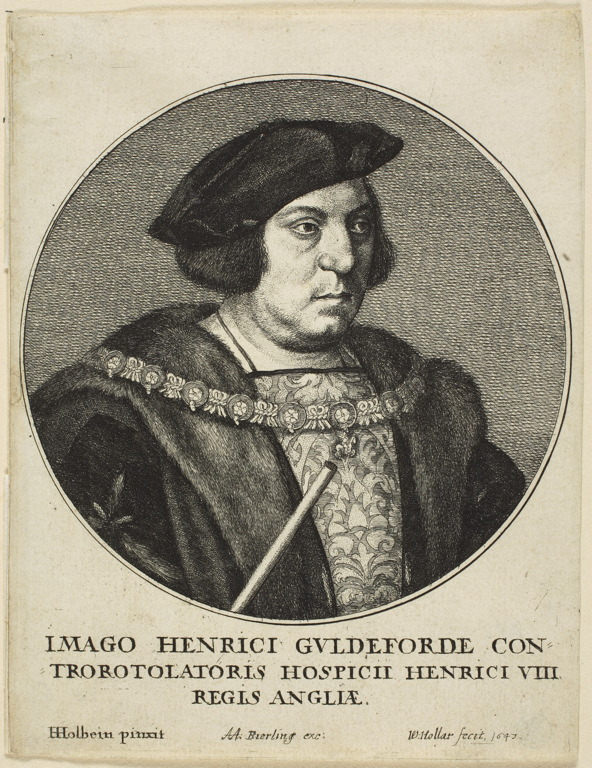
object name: Print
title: Sir Henry Guildford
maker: Wenceslaus Hollar (Bohemian, 1607-1677); after Hans Holbein the younger (German, c.1497-1543)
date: 1647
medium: Etching on ivory laid paper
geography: Bohemia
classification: etching; print; prints and drawing